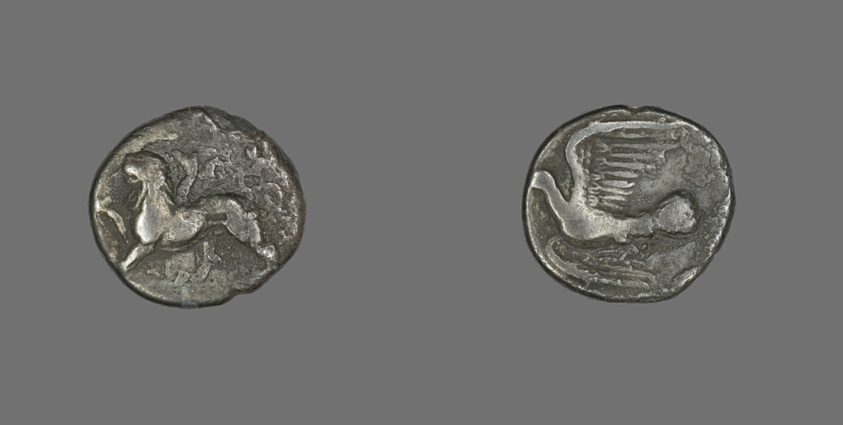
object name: Coin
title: Hemidrachm (Coin) Depicting a Chimera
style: greek, ancient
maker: Greek; minted in Sikyon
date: 400-300 BCE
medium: Silver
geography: Ancient Greece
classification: coin; ancient art